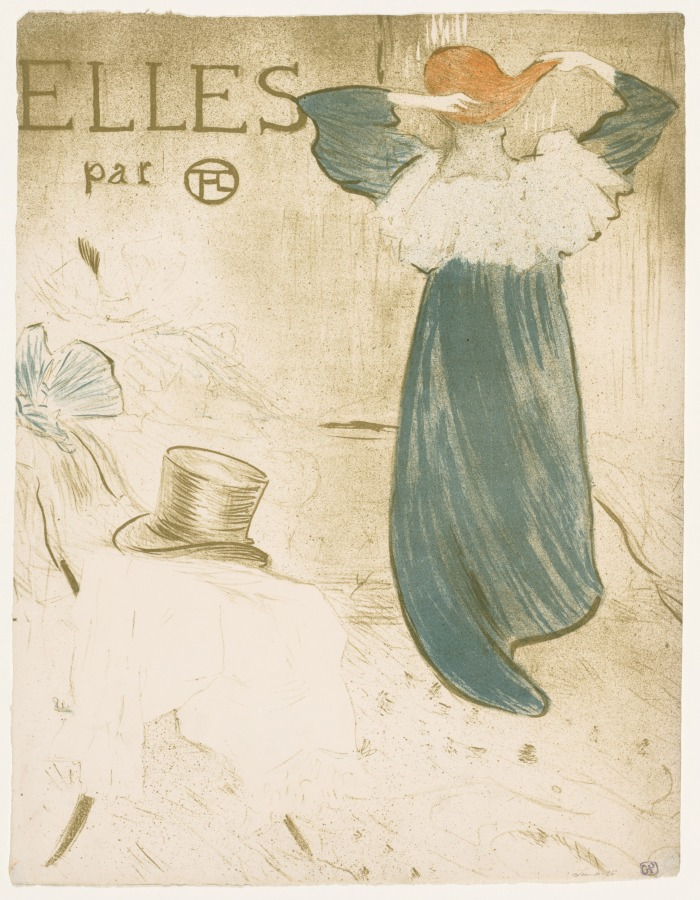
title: Elles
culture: France, 19th century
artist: Henri de Toulouse-Lautrec (French, 1864–1901)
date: 1896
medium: color lithograph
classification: Print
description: The French publisher Gustave Pellet, hoping to attract new customers, persuaded Lautrec to make a series of ten prints, plus frontispiece and cover, depicting brothels. Although it was not unusual to see prostitutes pictured in the popular press, Lautrec was the first well-known, successful artist to tackle this subject. The set was a commercial failure when it first appeared, perhaps because the scenes are not erotic. Lautrec had said that "they are women to my liking," and between 1892 and 1895 he often lived in various Parisian brothels for weeks at a time. This allowed him to witness the daily lives of the women, including the intimate acts of sleeping and bathing, and to sense their suffering. The result is that only two of the scenes show prostitutes as desirable temptresses. The remainder depict the mundane routine of the women's private world, their caring for each other, their boredom, and, living on the periphery of society, their sense of isolation. Lautrec did not take a direct moral stand. He portrayed the women sympathetically, restoring to them their humanity. One scene shows Juliette Baron, whose life of vice has led to premature aging, bringing her daughter Paulette breakfast. Other images depict the women at private moments, bathing or combing their hair in natural, relaxed poses, unaware of being observed. The beauty of the drawing and use of color makes this set one of the masterpieces of late nineteenth-century French color lithography.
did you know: The top hat seen at left alludes to the presence of a male patron in this frontispiece to Henri de Toulouse-Lautrec's lithographic series about prostitution.